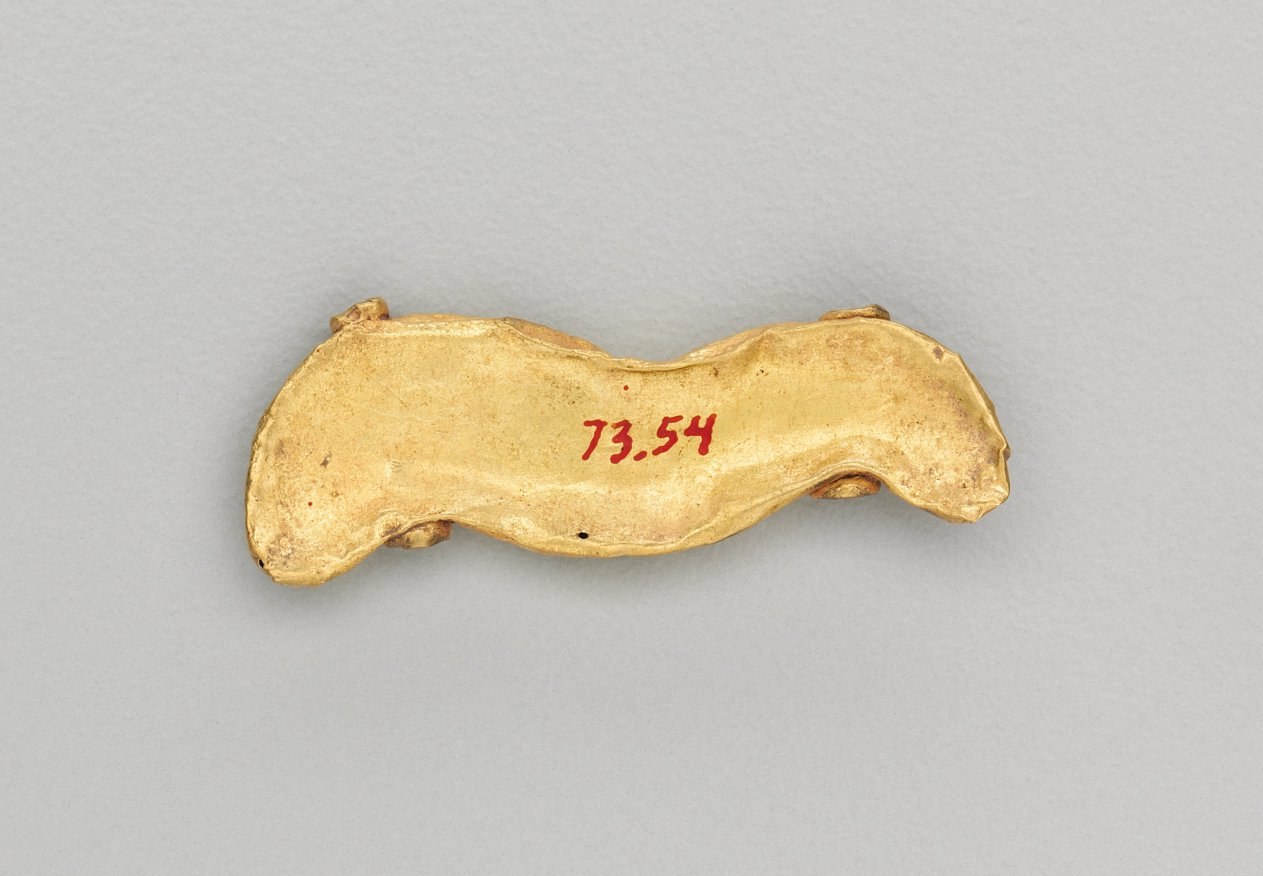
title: Set of Pendants Ending in a Bull's Head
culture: India, Shunga period (185–78 BCE)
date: 185–72 BCE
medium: gold repoussé with granulation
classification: Jewelry